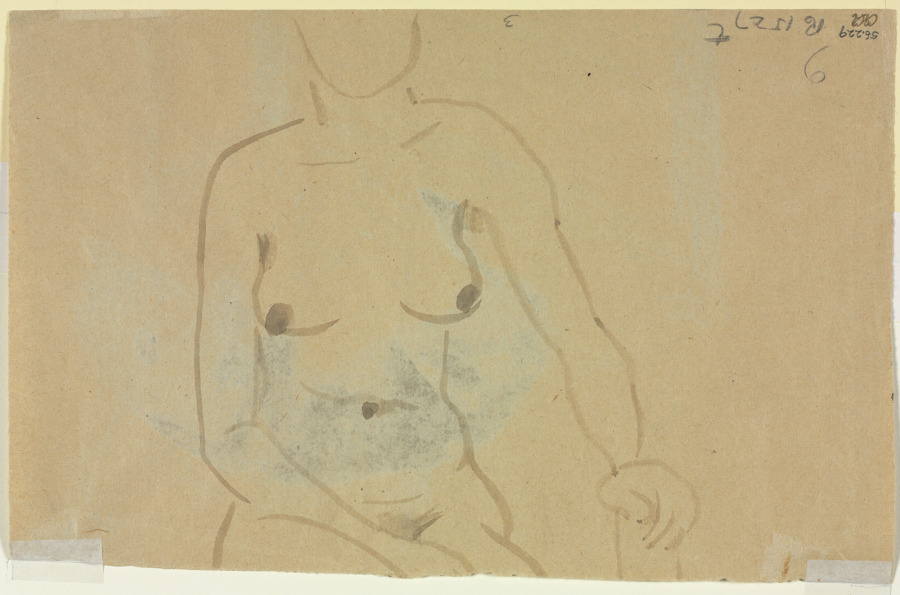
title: Torso of a Nude Woman (verso)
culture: France, 20th century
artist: Jane Poupelet (French, 1878–1932)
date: first third 1900s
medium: brush and gray wash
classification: Drawing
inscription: upper center, in graphite: 3 [upside down] ; upper right, in graphite: R 1527 t [t in superscript] [upside down] ; upper right, in graphite: 6 ;